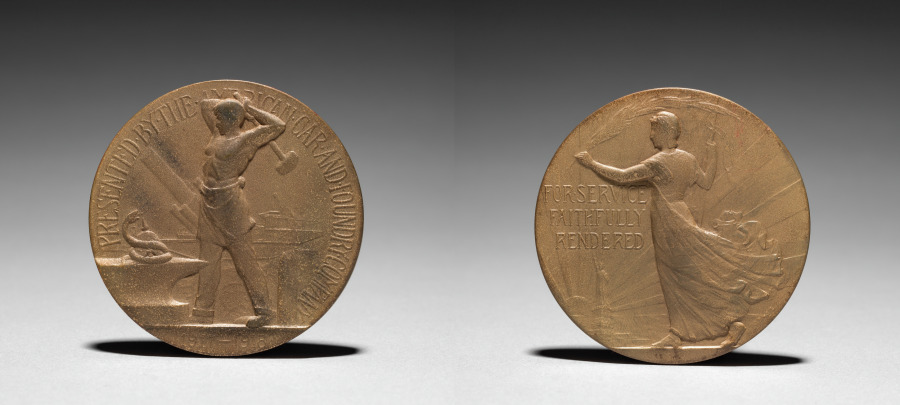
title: Honor Medal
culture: America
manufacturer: American Car and Foundry Co. (American)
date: 1917–1918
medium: bronze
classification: Metalwork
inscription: "For Service Faithfully Rendered"; signed: "C.B. - J.K."